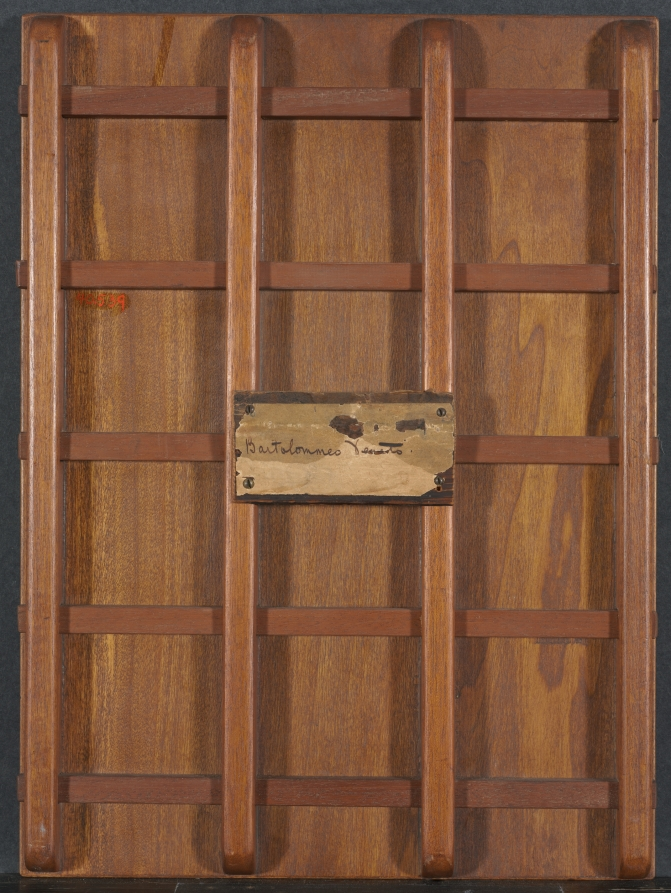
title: Portrait of a Man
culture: Italy, 16th century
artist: Bartolomeo Veneto (Italian, 1531)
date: c. 1510s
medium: oil on wood, transferred to wood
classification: Painting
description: This young man is possibly a member of the Sforza household, the ruling family of Milan during the Renaissance. He wears a plaquette on his hat indicating his nobility and status. This medallion depicts an actual work by Andrea Riccio (1470–1532), an artist whose work is represented in the museum's collection. The medallion illustrates an allegory of fortune and virtue personified by a winged woman and a child.